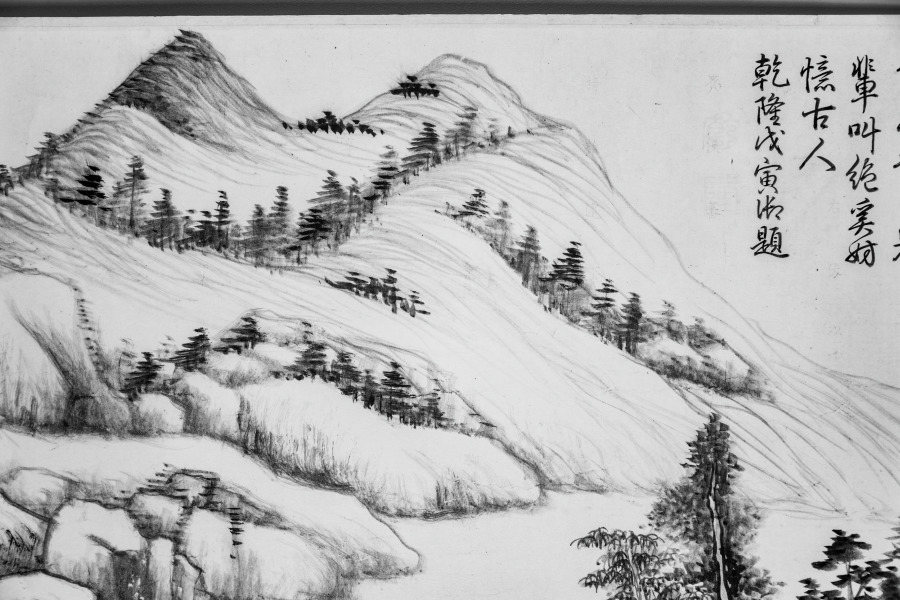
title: River and Mountains on a Clear Autumn Day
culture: China, Ming dynasty (1368–1644)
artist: Dong Qichang (Chinese, 1555–1636)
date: c. 1624–27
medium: Handscroll; ink on Korean paper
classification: Painting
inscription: 黃子久江山秋霽似此，當恨古人不見我也。思翁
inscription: 董文敏每遇高麗鏡面箋，書畫尤為入神。此卷改表紙用之，字跡隱然，兼有朝鮮之印。至於筆法圓秀，真接倪黃。豈文沈所可同日而語也。 康熙庚午中秋後一日，天氣澄爽，重裝初畢，跋於瓶廬。抱瓮翁高士奇。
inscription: Second inscription by Gao Shiqi 高士奇 (1645–1704): On the twenty-third day of the ninth month, the jiaxu year of the Kangxi era [1694], I packed my bags to head north. When my boat passed Wuchang [Suzhou], Mr. Mantang [Song Luo] brought wine to bid me farewell so that we could share our thoughts on our separation in the last few years. I showed him the paintings and calligraphy which I collected and asked his opinions. Since Mr. Mantang does not own any handscrolls by Wenmin [Dong Qichang], I leave this one for him in commemoration of our parting; thus the painting will have a worthy owner and our meeting will become a beautiful story in the future. It is the fourth day after the beginning of winter, with the sky clear and sober. Trees under frost have turned red and yellow, seemingly echoing the brush and ink in the painting. I also ask Mr. Mantang to inscribe a poem to commemorate our meeting so that it will survive forever.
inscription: 1 colophon and 4 seals of Song Luo 宋犖 (1634–1713): Who is the foremost art connoisseur of our dynasty?/ Tangcun [Liang Qingbiao, 1620–1691] is dead, so the title passes to Jiangcun [Gao Shiqi]./ Leaving office, you retired for five years in the Lake region./ Fondling handscrolls and hanging scrolls from morning to evening./ You sent me your collection catalogue Xiao Xia Lu last year;/ It is indeed the true equal of [Zhou Mi's] Yun Yan Guo Yan./ This year you returned to the capital by imperial order;/ Your boat with calligraphy and paintings anchored at the river bank in Suzhou./ When we met each other you did not waste any time for conversation by poured out immediately/ From your "coral net" extraordinary treasures./ You produced incomparable scrolls, with gold-inscribed labels and jade rollers,/ Pouring out from bags and trunks, they were spread in disarray./ Without a word, I rolled and unrolled until my fingers were numbed,/ We sat straight, facing each other quietly, and never felt tired./ For three days we forgot about sleeping and food./ And at times we shouted our joy out loud, forgetting who is host or guest./ Your Dwelling in the Fuchun Mountains and the Yuansheng manuscript/ These peerless works I myself examined with delight./ As an added pleasure to the farewell dinner under the Maple Bridge,/ You allowed me to hold again this handscroll by Dong Qichang--/ The Misty River and Piled Peaks [by Zhao Mengfu] and this Clear Autumn Day are two extraordinary masterpieces./ In showing such life and spirit with "qi yun." the artists were truly "men of heaven."/ The Clear Autumn Day is not even three feet long,/ Painted on tributary Korean paper, it shines like silver./ Every building up and every turn of the mountains imitates nature,/ Every tree and every rock is removed from the commonplace./ From the beginning, the theory of poetry is the theory of painting,/ Like the lotus and the morning sunshine, they complement and refresh each other./ The artist's inscription regrets that "the Old Masters cannot see my scroll."/ Huang Gongwang would have agreed in his grave./ The vermilion of the seals glitter and dazzles the eyes,/ These added accessories are as valuable as jade./ You are very kind to give it to me,/ The feelings expressed in your inscription are so sincere./ Wanting to refuse, but unable, I accept it to respect your wish,/ And taking off my gown and cap I wrapped it with care./ You asked me to write a long poem in commemoration of this beautiful occasion,/ I am too ashamed that my effort in response is so poor and inadequate./ Returning home, I unrolled it under candlelight, trying to write the colophon,/ The light of the waning moon shines at the foot of the mossy wall./ Earnestly humming and brows knit in deep thought, I try to compose;/ The verses are not outstanding, but the facts are real./ With this poem recorded at the end of the scroll, I mail it to you for approval,/ This poem and this painting shall outlast a thousand springs. (Translation by LYSL/HK/WKH)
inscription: 1 colophon and 2 seals of Shao Changheng 邵長蘅 (1637–1704); 2 inscriptions and 14 seals of the Qianlong 乾隆 emperor (r. 1736–95); 1 seal of the Jiaqing 嘉慶 emperor (r. 1796–1820); 3 seals of the Xuantong 宣統 emperor (r. 1908–11); 1 seal unidentified.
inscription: [印] 朝鮮國王之印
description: Dong Qichang had a tremendous impact on the artistic practices and historiography of later generations; his works and writings shaped literati aesthetics. Here, Dong places an abstract landscape composition diagonally across the picture plane, configured to recall earlier masters and simultaneously express his own personal style. Dong’s inscription claims, Huang Gongwang’s Autumn Day, looks like this. I truly regret the master has not seen my work. In fact, Dong Qichang may have had Dong Yuan’s Xiao and Xiang Rivers in mind, a work he owned and considered a key work in Chinese art history.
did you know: The painting has an imprint of a Korean seal that reads "Seal of the king of Joseon."